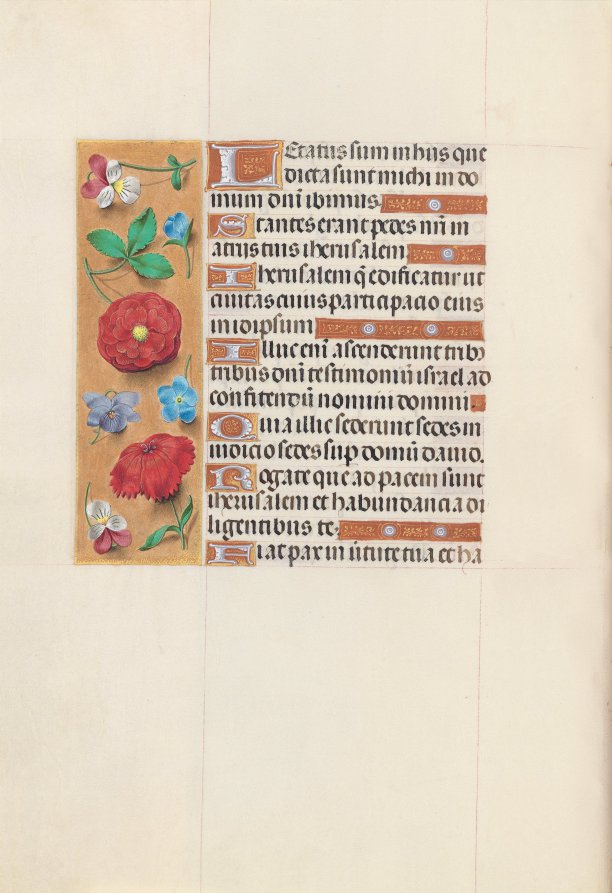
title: Hours of Queen Isabella the Catholic, Queen of Spain: Fol. 148v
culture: Flanders, Ghent and Bruges, late 15th century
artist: Master of the First Prayerbook of Maximillian (Flemish, c. 1444–1519)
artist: and Associates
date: c. 1500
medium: ink, tempera, and gold on vellum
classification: Bound Volume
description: This manuscript was illuminated by a circle of at least five highly organized manuscript painters active in the Flemish cities of Ghent and Bruges. The principal illuminator was Alexander Bening, who painted the majority of the book's miniatures. Manuscripts produced by this circle of artists are renowned for the decoration of their borders, which typically feature a rich variety of realistically-painted flowers, birds, and butterflies. This prayer book, called a book of hours, was intended not for a cleric, but for the private devotions of a lay person-in this case, Isabella the Catholic, Queen of Spain (1451-1504). Isabella's coat of arms embellishes the book's frontispiece. It is unlikely that the book was commissioned by the Queen herself; rather, she probably received it as a diplomatic gift from someone courting her patronage, perhaps Cardinal Francisco Jimenez de Cisneros. A Franciscan friar, Jimenez was dependent upon Isabella for his advancement, first to the post of Queen's confessor in 1492, and then to Archbishop of Toledo in 1495.